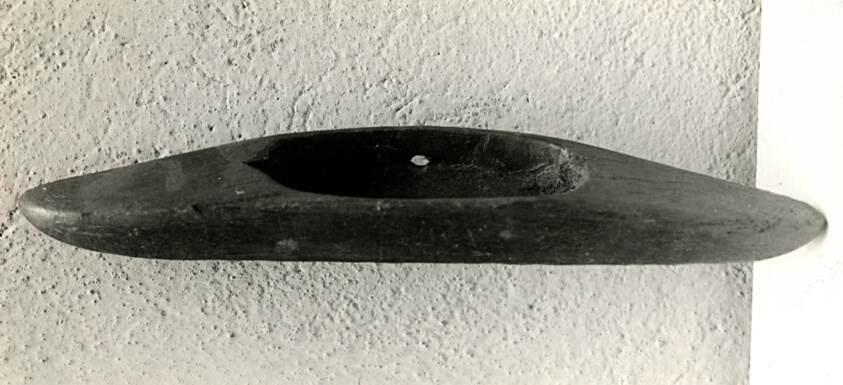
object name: Textile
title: Shuttle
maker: Europe or United States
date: 18th/19th century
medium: Wooden weaving tool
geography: Europe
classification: textile; weaving; textile working equipment; accessories (object genre)